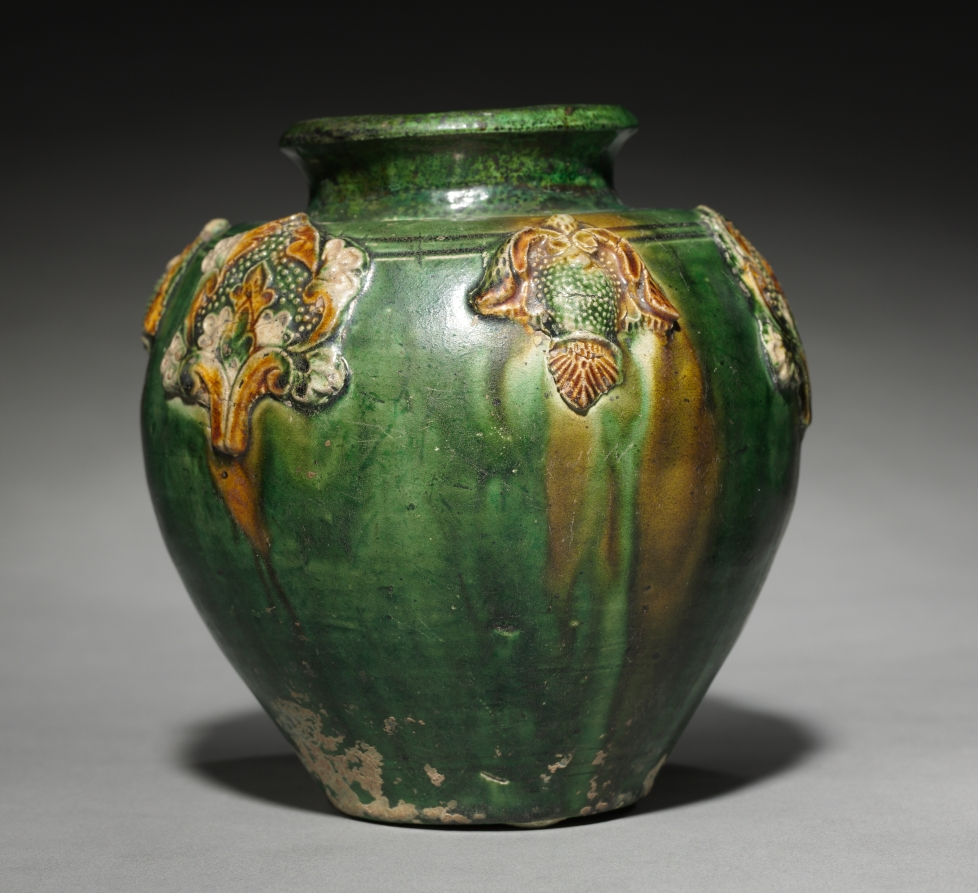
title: Jar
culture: China, Tang dynasty (618-907)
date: late 600s–700s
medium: pottery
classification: Ceramic